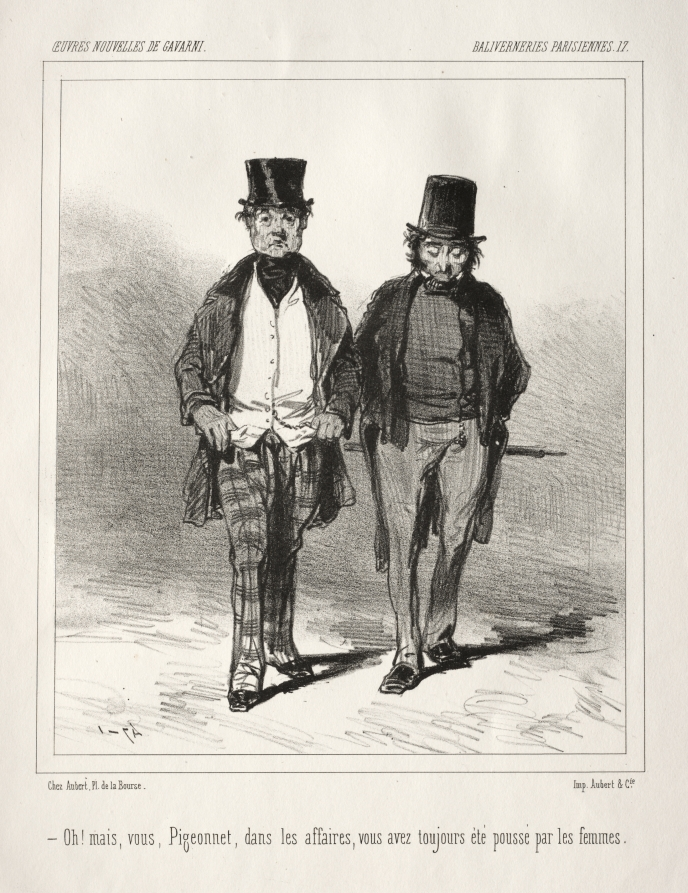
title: Baliverneries Parisiennes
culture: France, 19th century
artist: Paul Gavarni (French, 1804–1866)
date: c. 1847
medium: lithograph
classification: Print